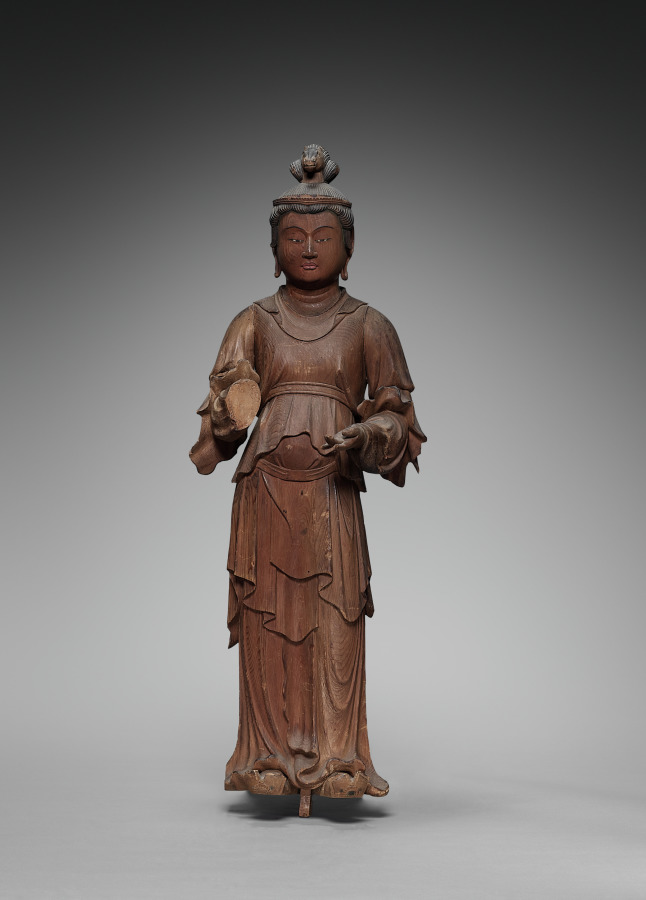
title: Batō (Horse-Headed) Kannon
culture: Japan, Kamakura period (1185–1333)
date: early 1300s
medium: Wood with traces of color and gold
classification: Sculpture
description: Batō Kannon, or Hayagriva Avalokiteshvara in Sanskrit, is the “horse-headed” form of the bodhisattva of compassion, who presides over the realm of animals in the Buddhist Six Realms of Transmigration (rebirth). A horse’s head appears in the hair of this sculpture to identify it. Bodhisattvas are beings who, though enlightened, choose to remain within the worlds of existence to help others. The six realms are heaven, hell, human, animal, hungry ghost, and ashura, or fierce supernatural entities.